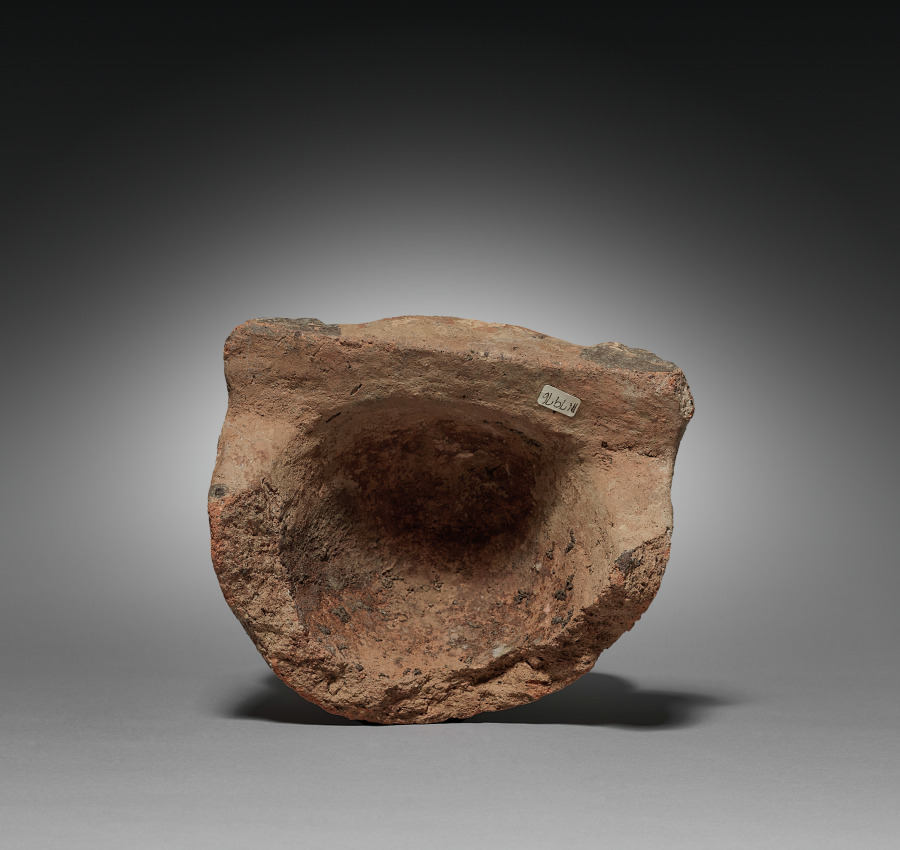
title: Antefix in the Form of a Maiden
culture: Etruscan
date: late 500s–early 400s BCE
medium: Painted terracotta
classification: Sculpture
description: Staring out with almond-shaped eyes and enigmatic smile, this brightly painted female head hides a rounded back made to serve an important function. She is a molded terracotta antefix, made to cap an open-ended roof tile along the sloping edge of a wooden building. Depending on the size of the structure it adorned, this antefix may have sat alongside dozens of others, likely all similar in form and painted decoration, and perhaps accompanied by additional polychrome architectural sculpture. Sometimes identified as maenads, the female followers of Dionysos (Etruscan Fufluns), such figures might also be nymphs or anonymous maidens.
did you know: Much Etruscan architectural sculpture was molded terracotta rather than carved stone.